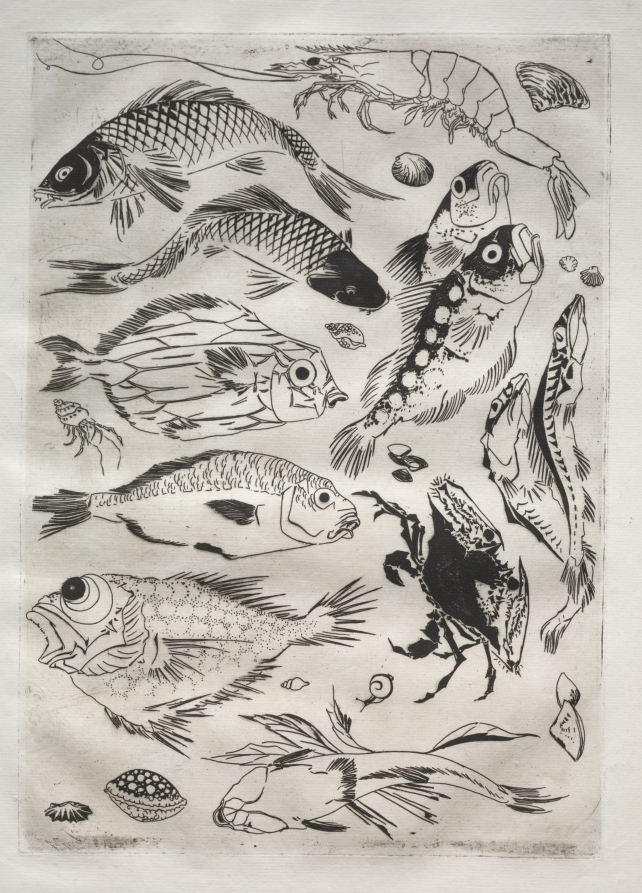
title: Dinner Service (Rousseau service): Fish (no. 24)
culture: France, 19th century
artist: Félix Bracquemond (French, 1833–1914)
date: 1866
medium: etching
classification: Print